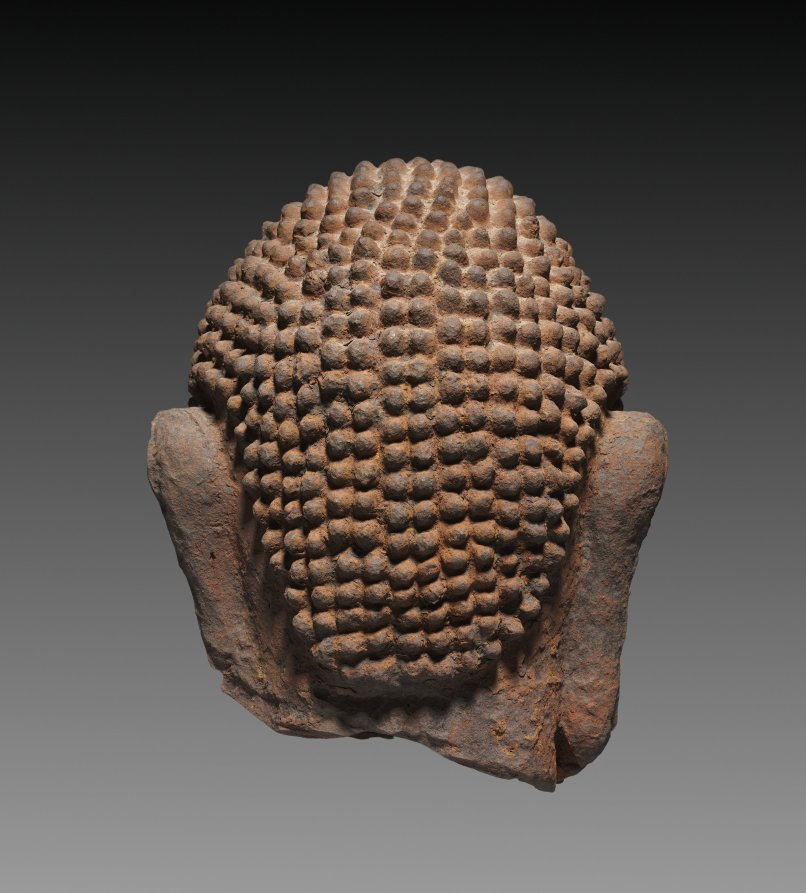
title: Buddha Head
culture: Korea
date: 1900s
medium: cast iron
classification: Sculpture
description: This Buddha has a soft and gentle smile, a typical attribute of Korean images of the Buddha. His plum cheeks and soft smile remind us of his childlike purity while his nearly closed eyes show him in a moment of meditation. The empty divot in the middle of the forehead would originally have contained a jewel symbolizing the light emanating from the Buddha. His head is topped with a profusion of snail-shell curls and an ushnisha, a mound symbolizing the Buddha’s enlightenment.